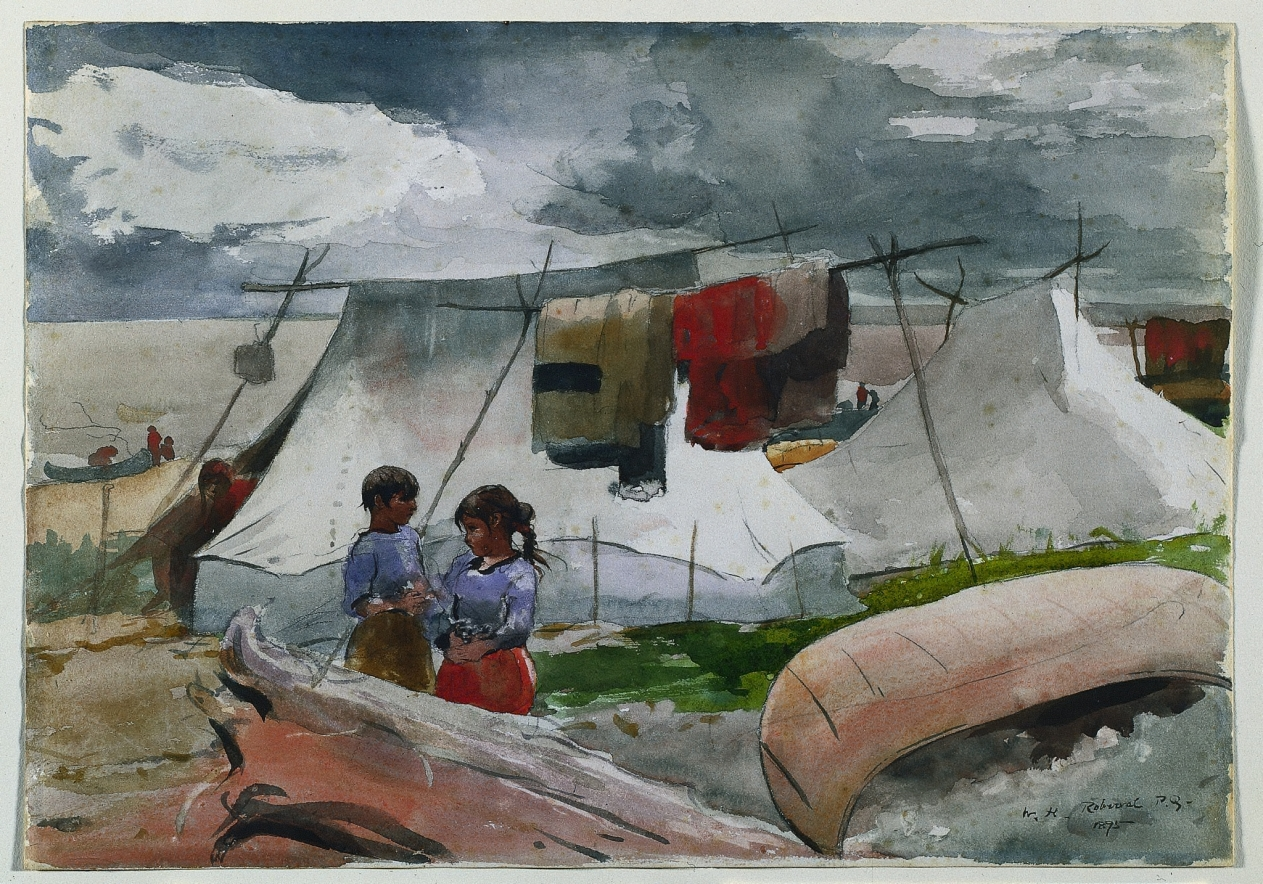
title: Indian Camp, Roberval, P.Q.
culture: America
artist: Winslow Homer (American, 1836–1910)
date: 1895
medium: watercolor with gouache over graphite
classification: Drawing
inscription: signed, lower right, in watercolor: W.H. Roberval P.Q. / 1895 ; VERSO, upper left, in orange crayon: ['9?]6 ; upper center, in orange crayon: No 1 ; lower right, in graphite: Aug 1 [upside down]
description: In 1895, Winslow Homer produced 25 watercolors while on a fishing expedition in Canada. Indian Camp, Roberval, P.Q. was painted at Lake St. John, about 100 miles north of Quebec and shows Montangnais Indians at Pont Bleue. Using straightforward visual material, Homer produced an unusual and arresting composition.